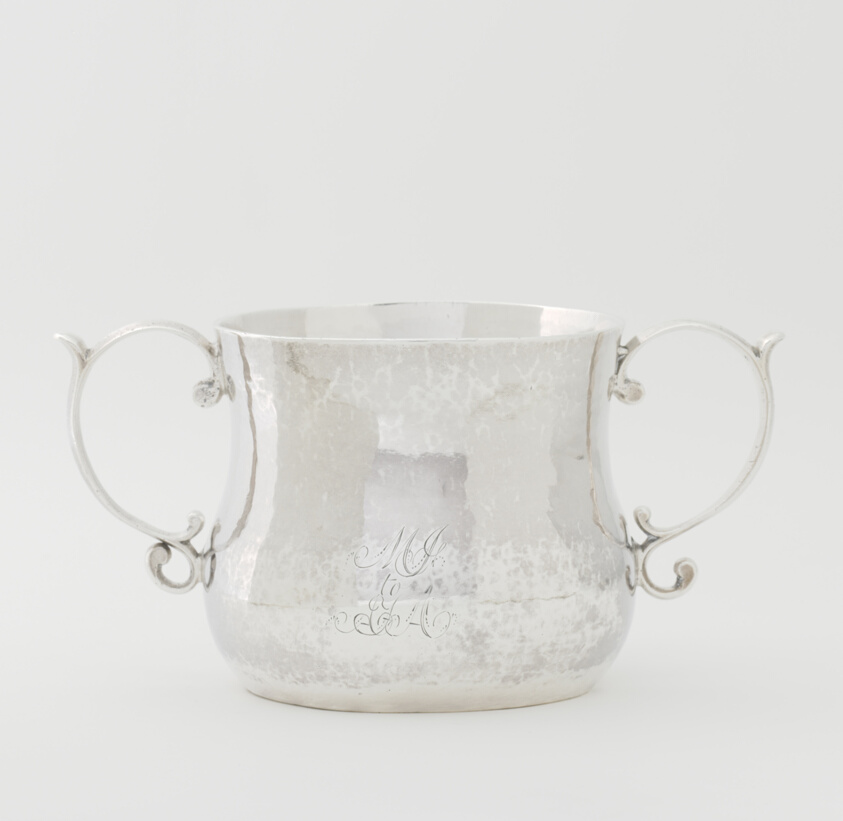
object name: Metalwork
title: Caudle Cup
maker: Jeremiah Dummer; American, 1645–1718; Boston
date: c. 1690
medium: Silver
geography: Boston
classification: drinking vessel; silver; american decorative arts; american arts; decorative arts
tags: dining, drinking